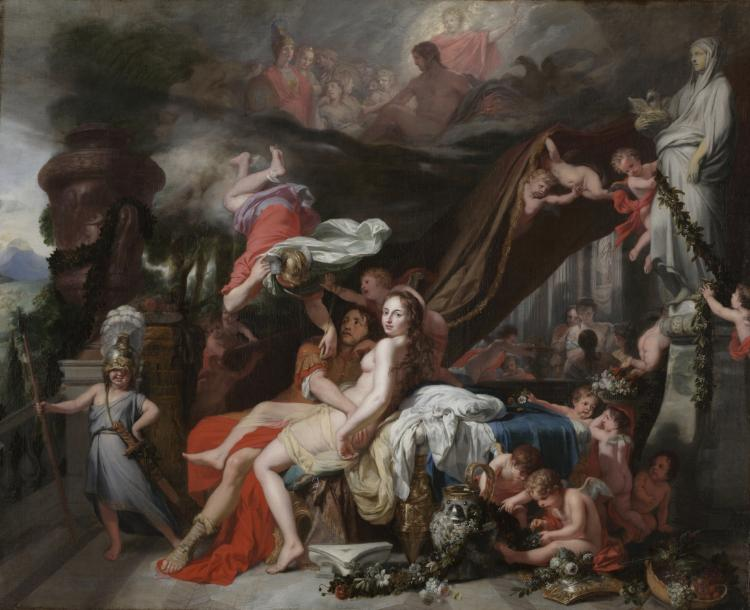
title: Hermes Ordering Calypso to Release Odysseus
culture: Netherlands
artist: Gerard de Lairesse (Flemish, 1641–1711)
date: c. 1670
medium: oil on canvas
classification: Painting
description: The Greek goddess Calypso held the hero Odysseus captive for seven years, preventing his return home from the Trojan War. Despite Calypso’s charms and the luxurious surroundings, Odysseus longed for his home and family, so the Olympian gods finally allowed his freedom. Here, the god Hermes swoops down to free Odysseus from Calypso’s embrace. De Lairesse, popularly known as the “Dutch Poussin,” introduced to the Netherlands a classicizing style influenced by artists of the French Academy.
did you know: Calypso, reclining on her bed, looks at us with the same charming smile she used on Odysseus.